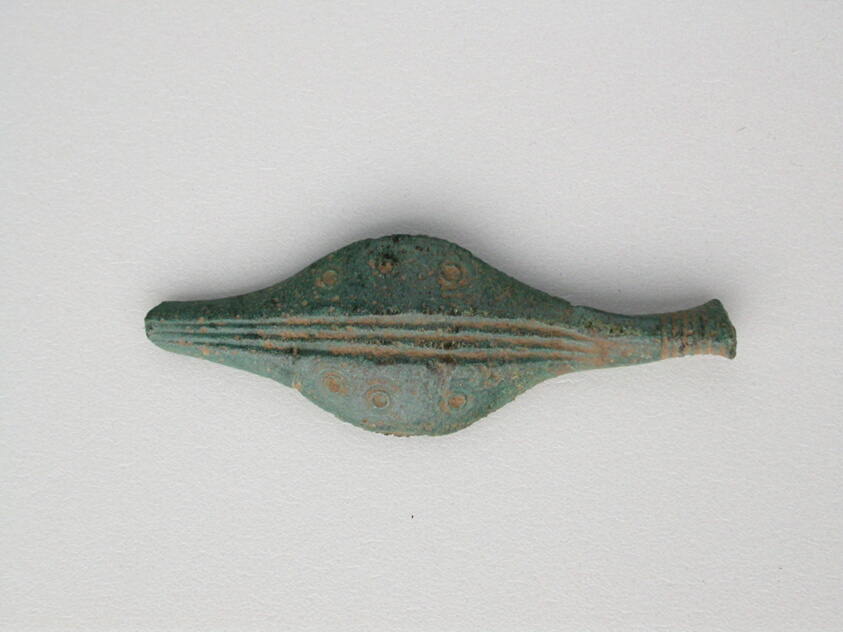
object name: Costume and Accessories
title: Fibula (leech type)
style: geometric, ancient, greek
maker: Greek; Thessaly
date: Geometric Period (800–700 BCE)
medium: Bronze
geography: Thessalía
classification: votive offering; ex-voto; fibula; costume